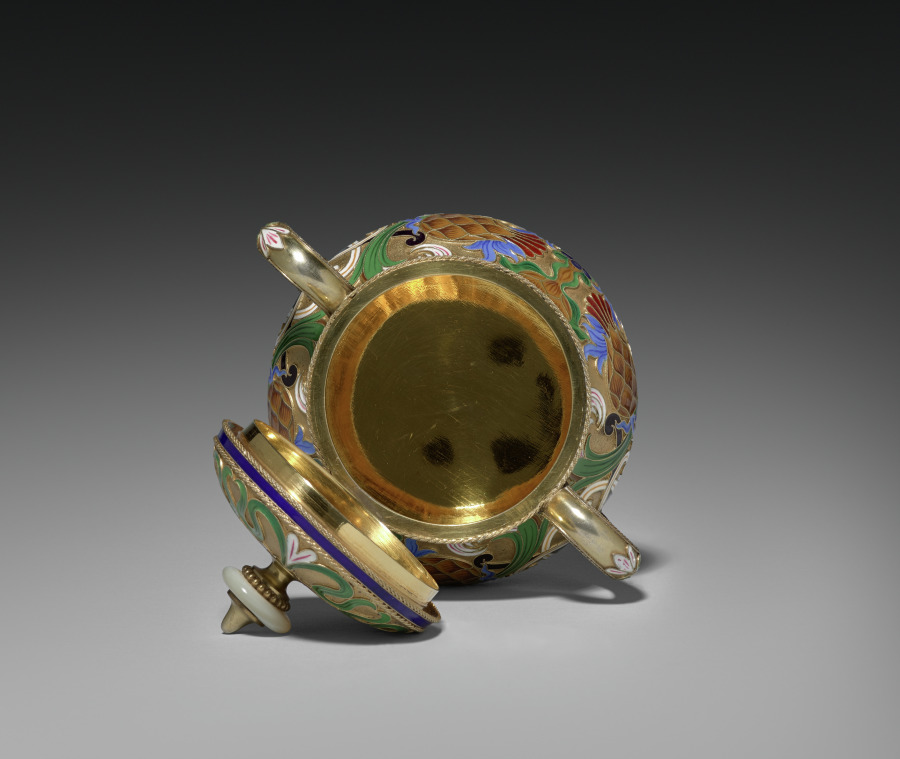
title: Covered Sugar Bowl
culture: Russia, St. Petersburg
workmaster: attributed to Feodor Ivanovich Rückert (Russian, 1840–1917)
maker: House of Fabergé (Russian, 1842–1918)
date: 1887–96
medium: silver gilt, opaque cloisonné enamel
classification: Miscellaneous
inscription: 84, St. George [assay mark for Moscow, 1882-1896]; C. Fabergé (in Cyrillic); double-headed eagle [imperial warrant]; St. George?; initials of Carl Fabergé (in Cyrillic); 10593 scratched.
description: Fabergé’s craftsmen in Moscow, especially under the watchful eye of workmaster Feodor Rückert, became known for their work in the pan-Slavic or neo-Russian style, hearkening back to 17th-century motifs of Russian folk art. Often on rather conventional shapes, Rückert and his silversmiths created an explosion of color, achieved through the historic technique of cloisonné enamel in which tiny metal lines are soldered to the surface then filled with glass powders in various colors and fired to create a high gloss finish. The result is a spectacular evocation of the 17th-century originals. Far from mere copies, however, Rückert's designs, such as this tea service, employ naturalistic or abstract motifs in a thoroughly modern adaptation of a remarkable earlier period of Russian art and decoration.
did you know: This covered sugar bowl is part of a larger tea service.